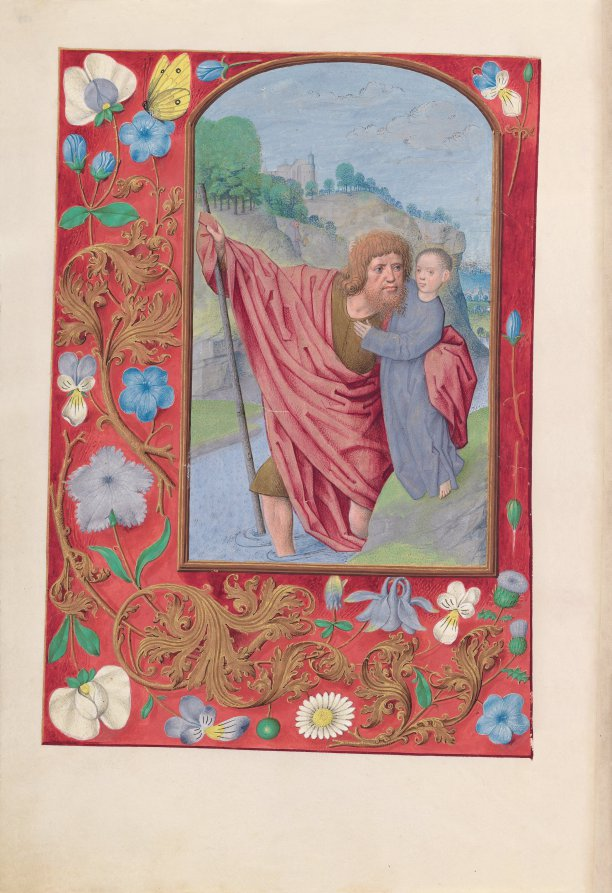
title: Hours of Queen Isabella the Catholic, Queen of Spain: Fol. 179v, St. Christopher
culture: Flanders, Ghent and Bruges, late 15th century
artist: Master of the First Prayerbook of Maximillian (Flemish, c. 1444–1519)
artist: and Associates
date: c. 1500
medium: ink, tempera, and gold on vellum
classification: Bound Volume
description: This manuscript was illuminated by a circle of at least five highly organized manuscript painters active in the Flemish cities of Ghent and Bruges. The principal illuminator was Alexander Bening, who painted the majority of the book's miniatures. Manuscripts produced by this circle of artists are renowned for the decoration of their borders, which typically feature a rich variety of realistically-painted flowers, birds, and butterflies. This prayer book, called a book of hours, was intended not for a cleric, but for the private devotions of a lay person-in this case, Isabella the Catholic, Queen of Spain (1451-1504). Isabella's coat of arms embellishes the book's frontispiece. It is unlikely that the book was commissioned by the Queen herself; rather, she probably received it as a diplomatic gift from someone courting her patronage, perhaps Cardinal Francisco Jimenez de Cisneros. A Franciscan friar, Jimenez was dependent upon Isabella for his advancement, first to the post of Queen's confessor in 1492, and then to Archbishop of Toledo in 1495.